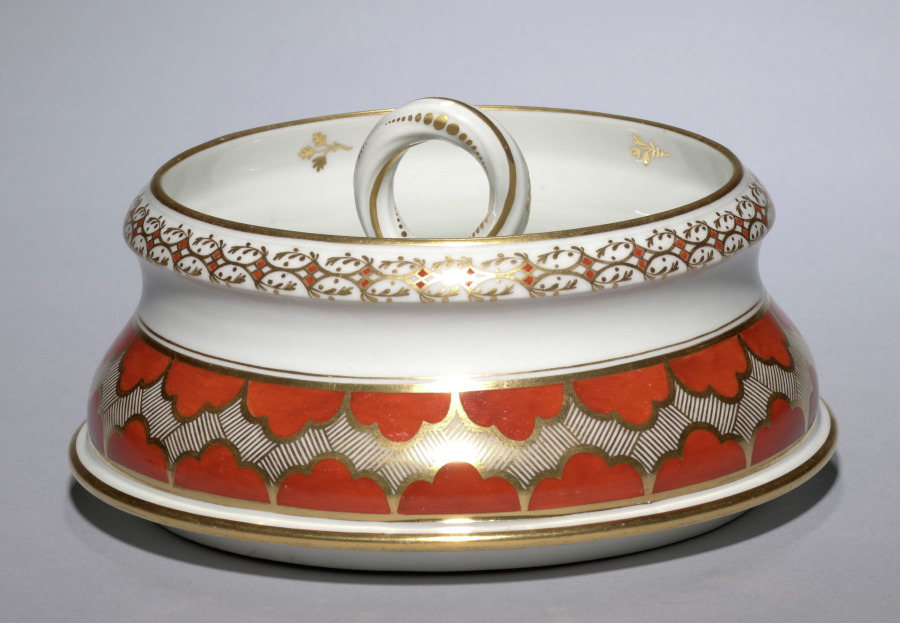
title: Cover for an Ice Pail (1 of 2)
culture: England, late 18th-early 19th Century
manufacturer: Flight & Barr (British)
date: c. 1792–1804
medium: porcelain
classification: Ceramic